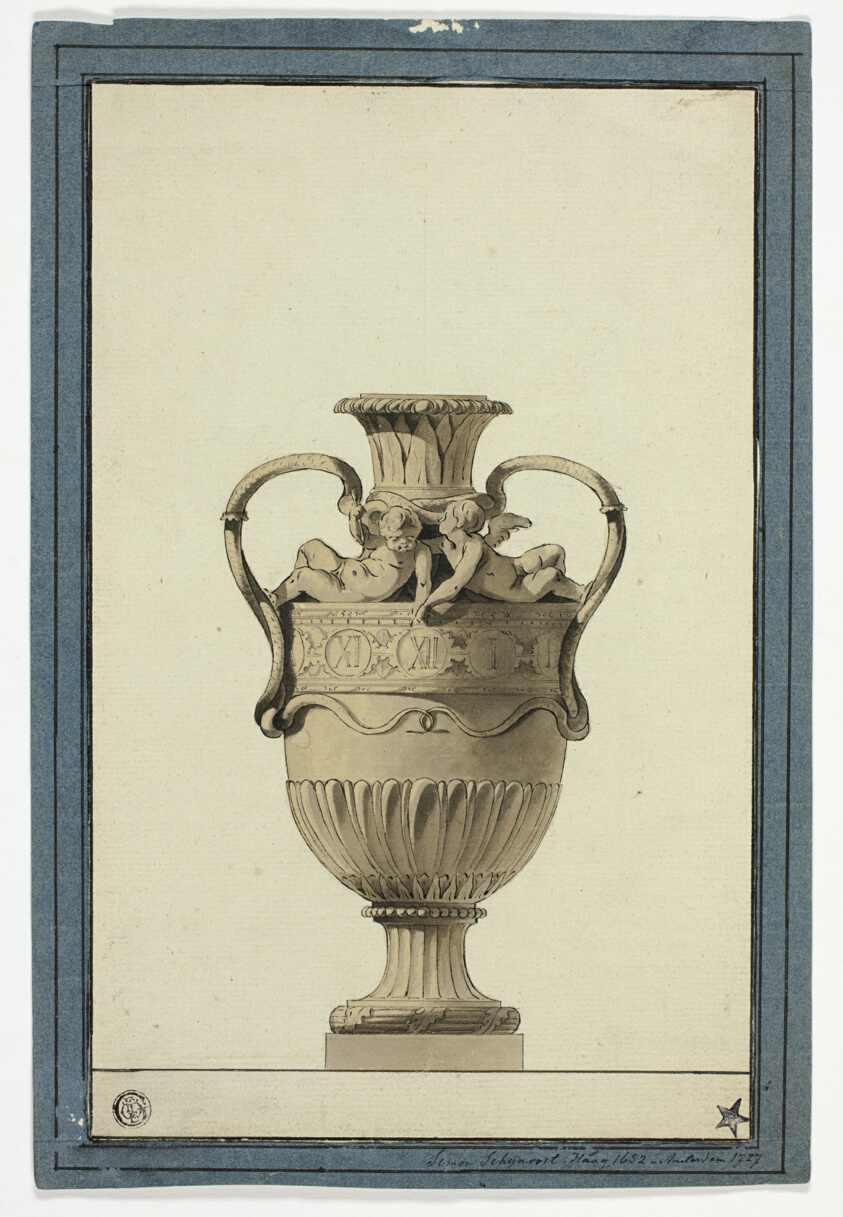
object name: Drawing and Watercolor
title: Design for a Clock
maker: Simon Schijnvoet (Dutch, 1653-1727)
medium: Pen and black ink, with brush and tan and gray wash, on cream laid paper, laid down on ivory laid paper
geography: Holland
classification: ink or chalk wash; drawings (visual works); prints and drawing